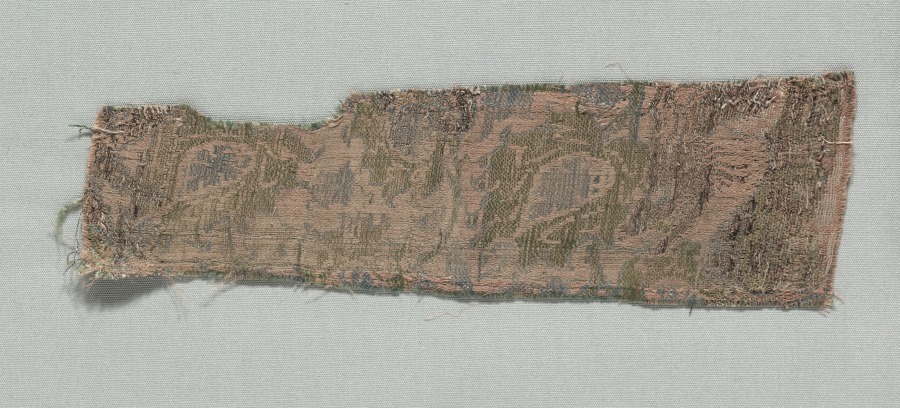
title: Three Fragments of Italian Gothic Silk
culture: Italy, second half of 14th century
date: 1350–1399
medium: lampas weave, brocaded; silk and gold thread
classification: Textile